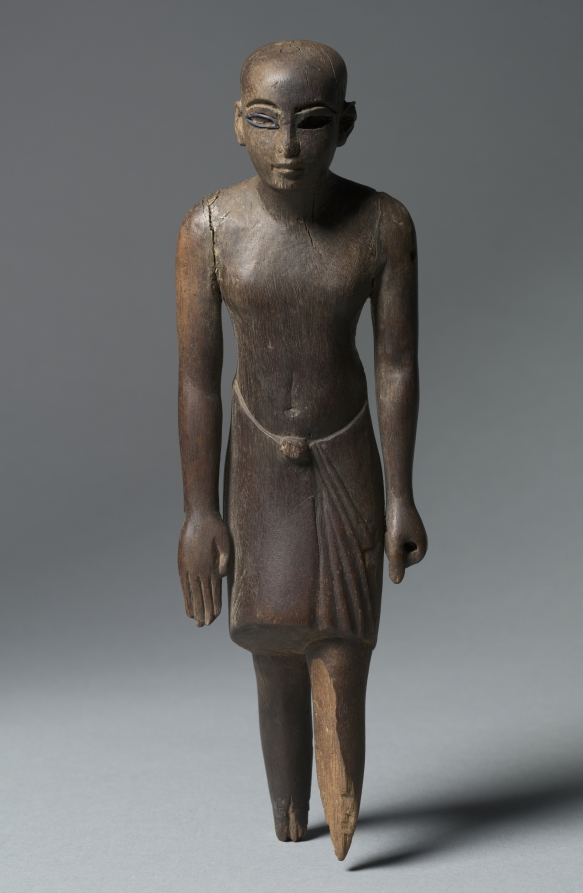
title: Statuette of a Man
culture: Egypt, New Kingdom (1540–1069 BCE), Dynasty 18, reign of Amenhotep III (1390–1352 BCE)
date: c. 1391–1353 BCE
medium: ebony inlaid with cobalt blue glass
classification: Wood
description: This ebony statuette was made late in the reign of Amenhotep III, during the Egyptian New Kingdom. The figure strides forward with his left leg advanced, arms held at his sides. His right hand is held flat and positioned parallel to his thigh, while his left hand forms a loosely clenched fist. Originally, both of his eyes and eyebrows would have been inlaid with cobalt-blue glass to enliven the man’s features; only the outline of his left eye now remains.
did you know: The arms of this figure were made separately and attached using small pins inserted into holes in the torso.